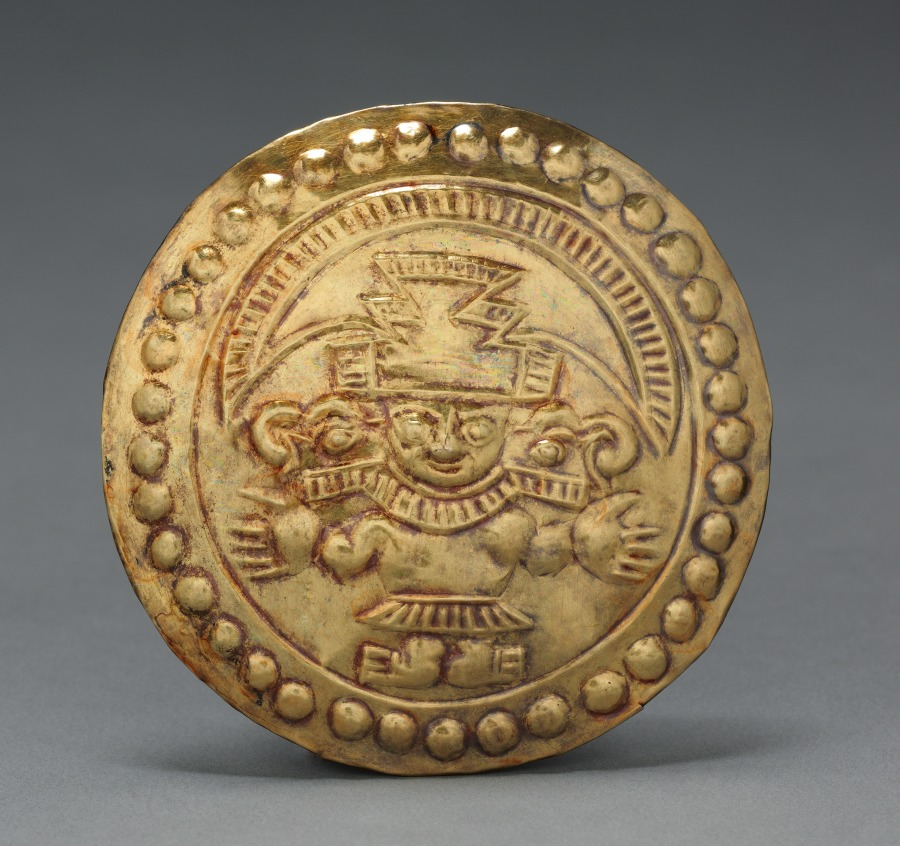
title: Pair of Ear Flare Frontals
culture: Peru, North Coast, Paramonga(?), Chimú style (900-1470)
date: Chimú style (900–1470)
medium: hammered gold alloy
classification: Jewelry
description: These gold discs, each with the image of a richly dressed Chimú lord, originally were attached to the fronts of ear ornaments equipped with long, thick shafts that passed through the ear lobes. Such ornaments were important markers of wealth and elite status.